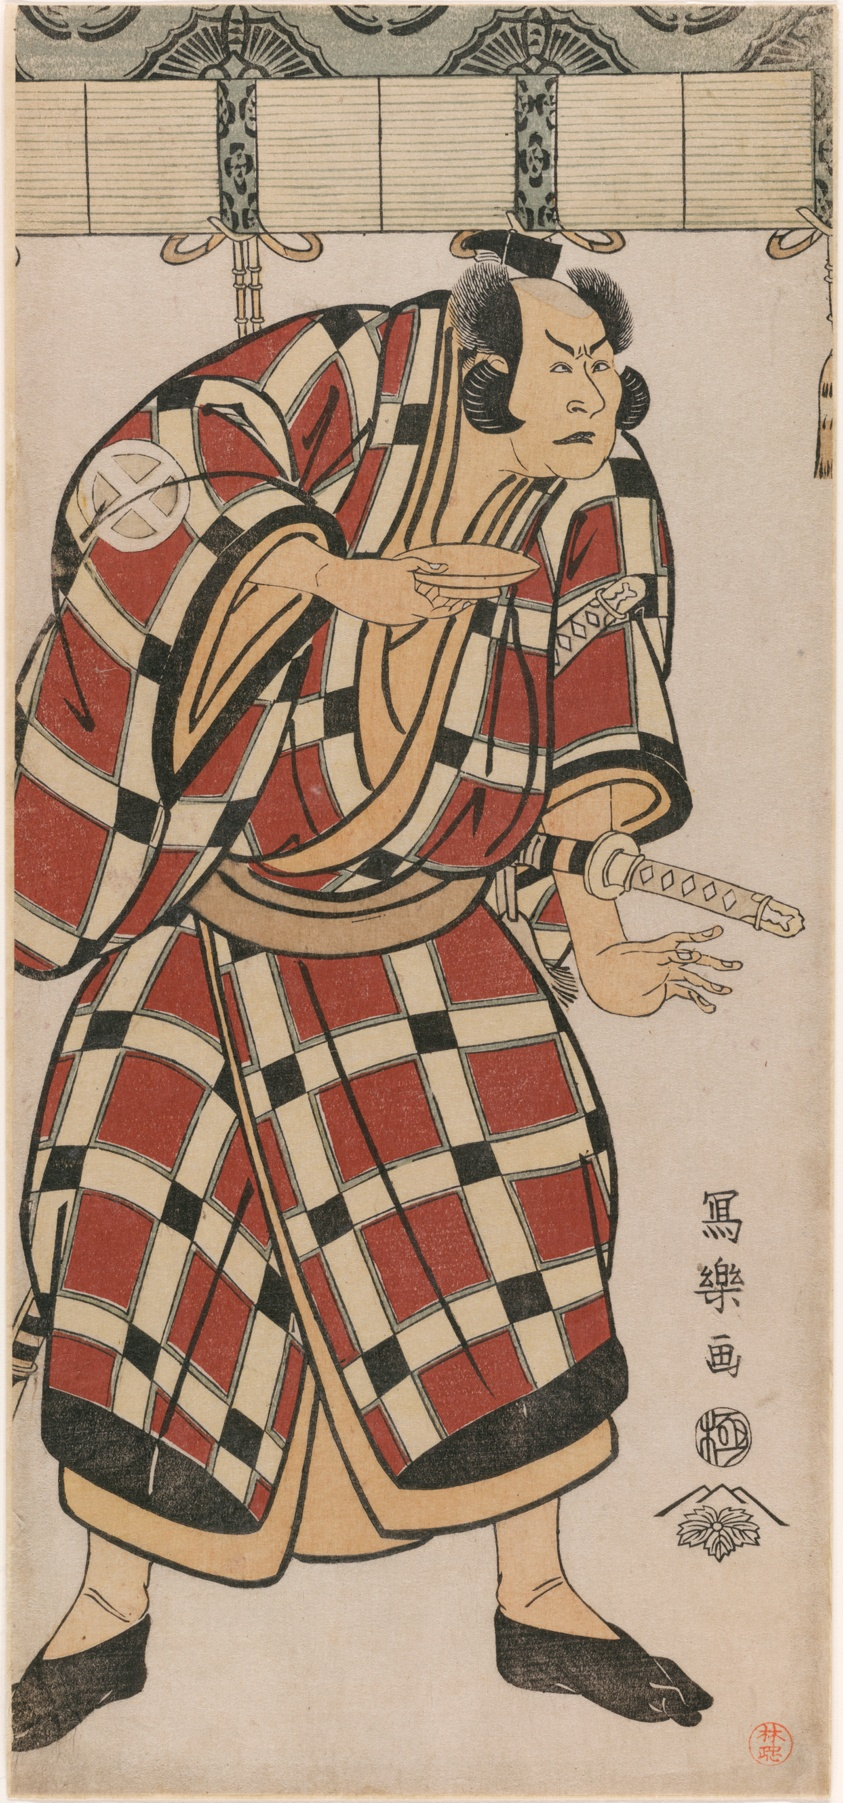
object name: Print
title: The actor Otani Hiroji III as Hata no Taizan Taketora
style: Japanese (culture or style)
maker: Toshusai Sharaku 東洲斎 写楽; Japanese, active 1794-95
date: 1794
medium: Color woodblock print; left sheet of hosoban triptych (right: 1928.1061, center: 1928.1062)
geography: Japan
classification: woodblock print; hosoban print; triptych; print